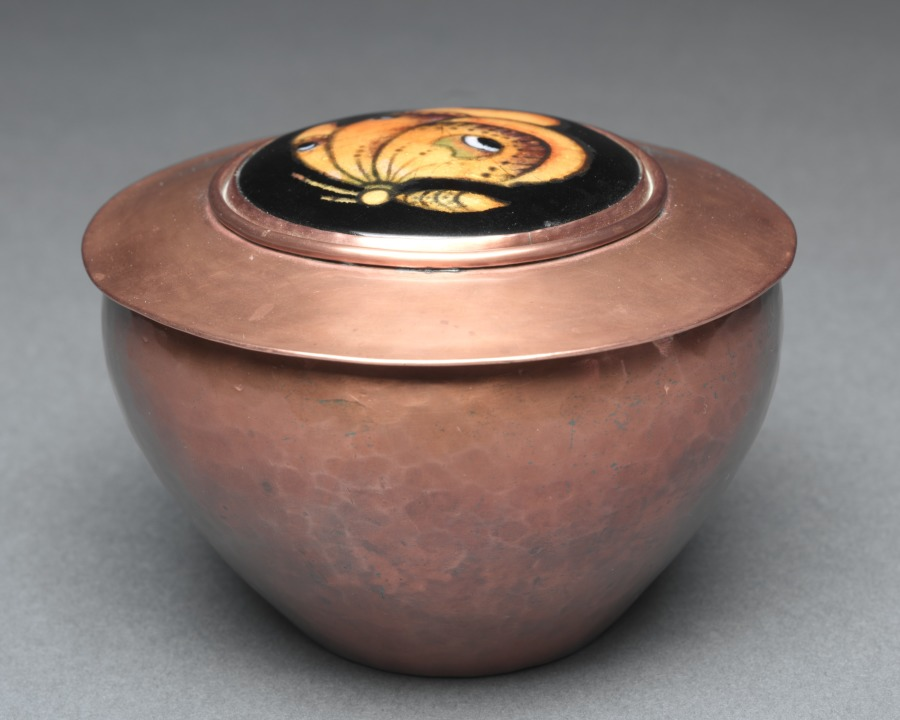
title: Covered Bowl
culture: America, Ohio, Cleveland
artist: Kenneth F. Bates (American, Cleveland, 1904–1994)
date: 1927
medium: copper and enamel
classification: Enamel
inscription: incised on bottom: "Kenneth F. Bates 1927."